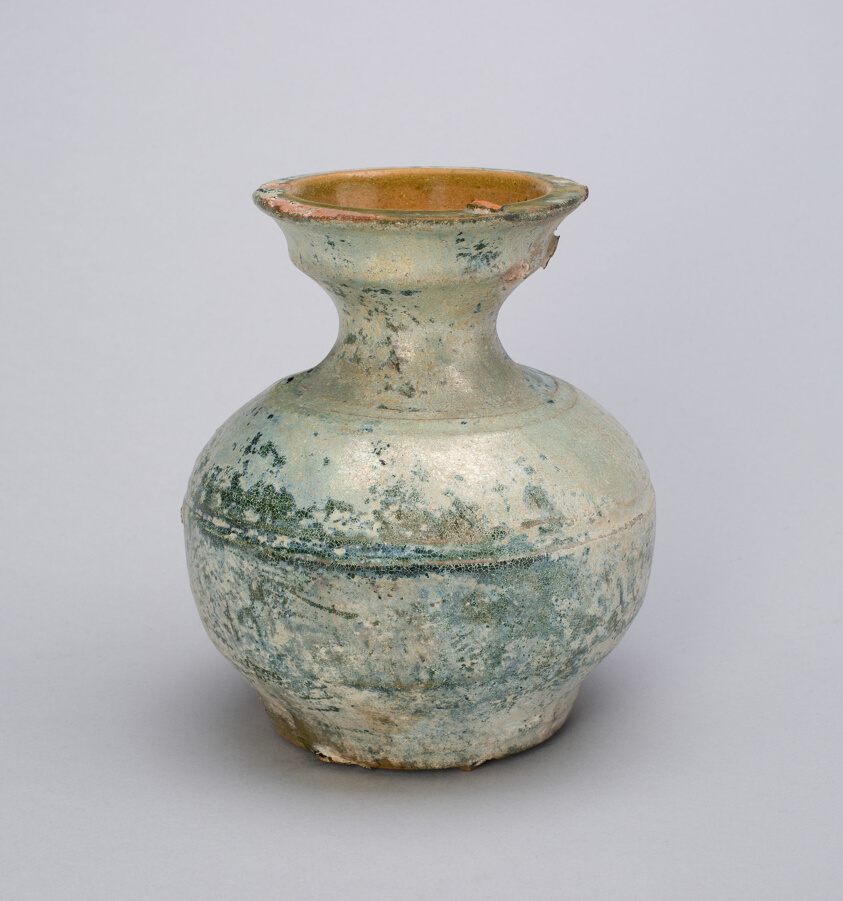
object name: Vessel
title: Jar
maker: China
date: Eastern Han dynasty (A.D. 25–220)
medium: Earthenware with green lead glaze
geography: China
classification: earthenware; asian art; ceramics; vessel